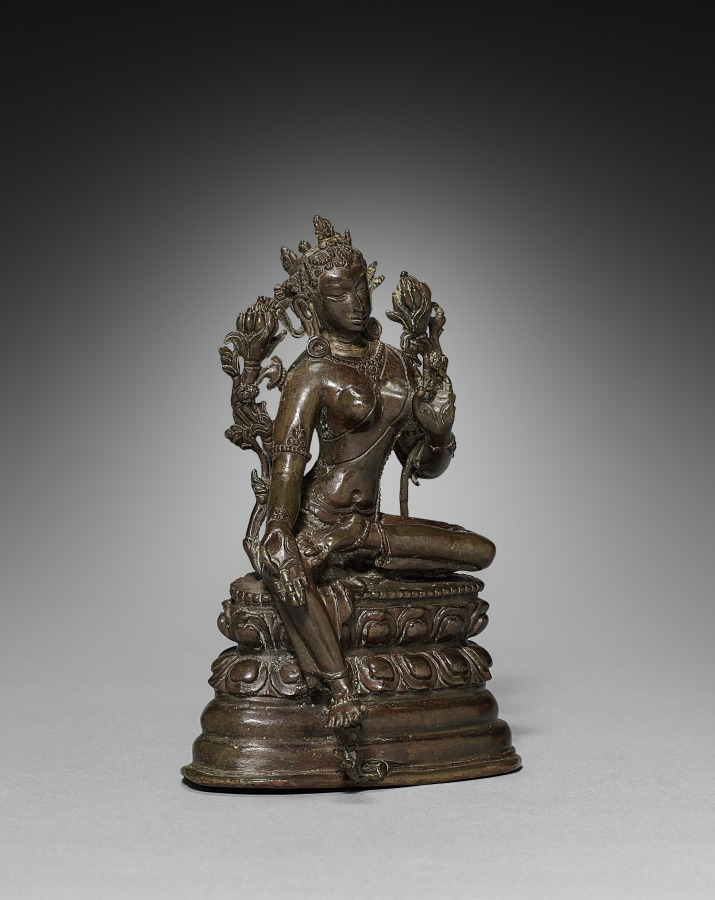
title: Seated Tara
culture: India, Bengal, late Pala dynasty, 12th Century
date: 1100s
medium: bronze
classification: Sculpture